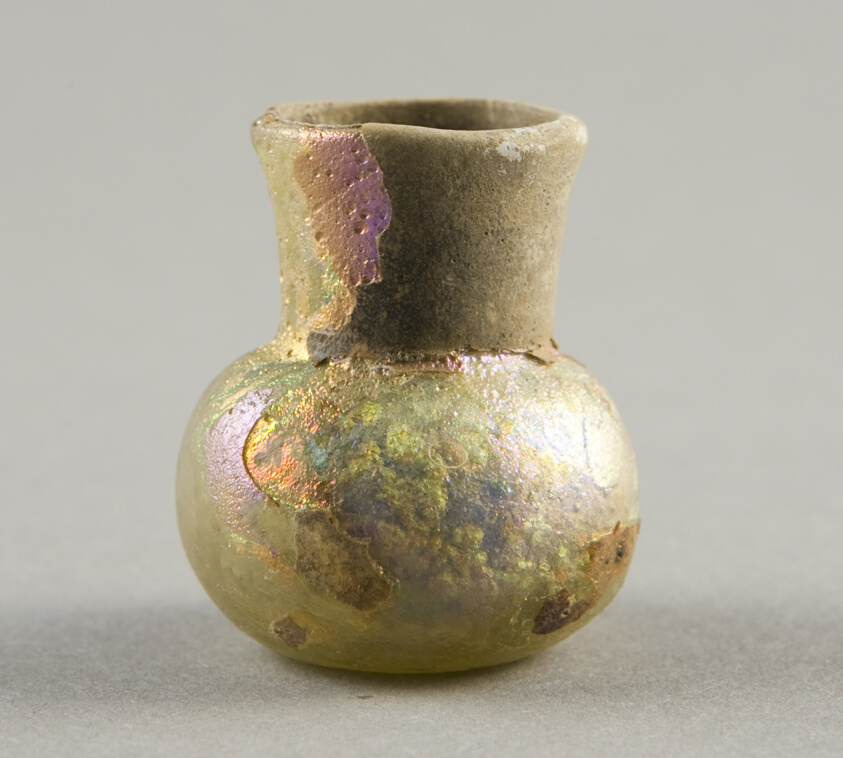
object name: Vessel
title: Jar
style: syrian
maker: Roman, Levant or Syria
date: 3rd-4th century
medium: Glass, blown technique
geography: Syria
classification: vessel; glass; ancient art